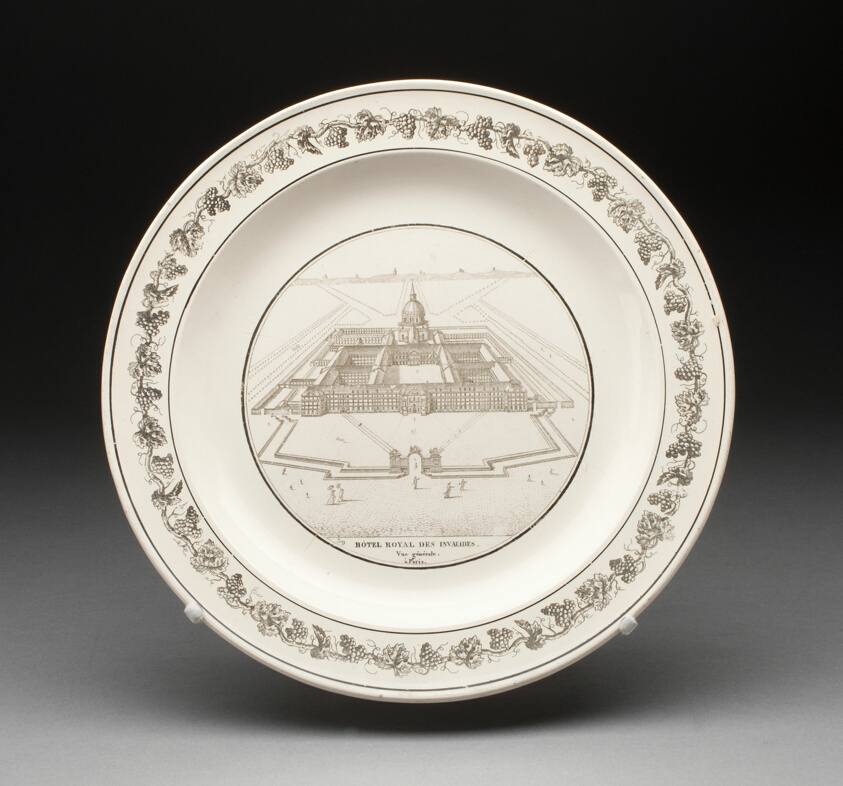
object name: Ceramics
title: Plate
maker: Creil Pottery (French, 1801-1840)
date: 1800/50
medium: Earthenware, transfer-printed (creamware)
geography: Creil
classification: plate (general, dish); earthenware; dish (vessel); european decorative arts; ceramics; creamware